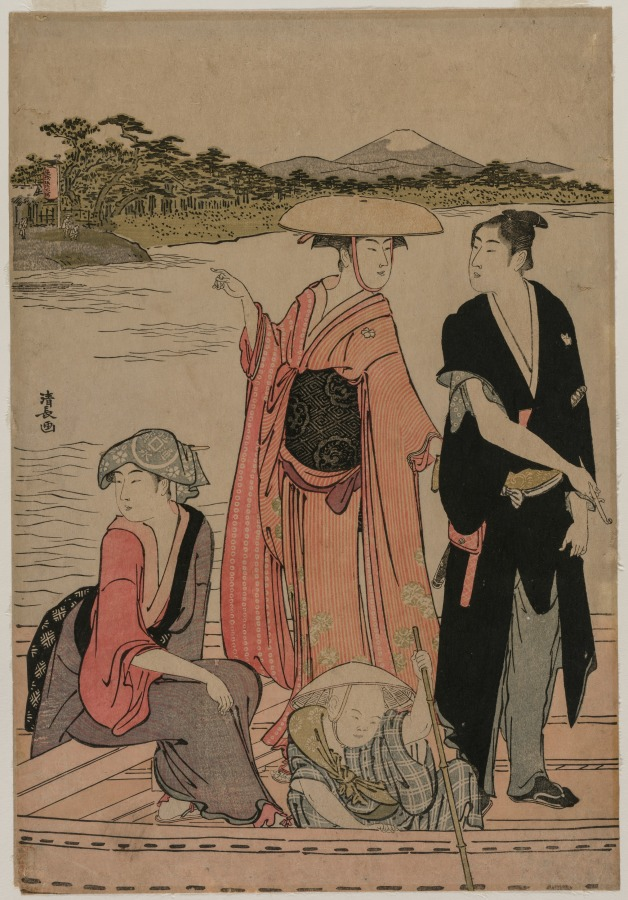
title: Passengers in a Ferry Boat on the Sumida River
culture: Japan, Edo period (1615–1868)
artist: Torii Kiyonaga (Japanese, 1752–1815)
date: 1784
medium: color woodblock print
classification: Print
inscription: Signature: Kiyonaga ga